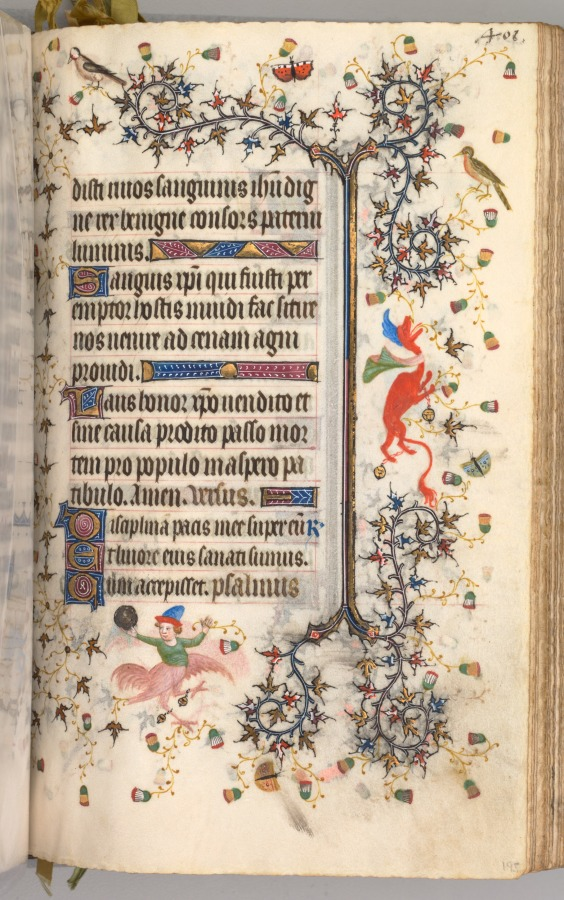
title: Hours of Charles the Noble, King of Navarre (1361-1425): fol. 195r, Text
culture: France, Paris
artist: Master of the Brussels Initials and Associates (French)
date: c. 1405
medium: ink, tempera, and gold on vellum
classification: Bound Volume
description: This precious volume was obviously highly prized by its owner, the French-born King of Navarre, who had his coat of arms painted on no less than twenty folios. Rather than directly commissioning this manuscript from a specific workshop, it seems that Charles the Noble acquired his book of hours -- perhaps ready-made for the luxury market -- while on a trip to Paris in 1404-05. A collaborative effort, six painting styles are evidenced within the pages of this codex, those of two Italians, two Frenchmen, and two Netherlanders. The painter who was responsible for the planning and decoration of the book, and who produced seventeen of the large miniatures, was a Bolognese artist known as the Master of the Brussels Initials. His principal assistant, responsible for most of the borders, was a Florentine who signed his name "Zecho" da Firenze on folio 208 verso.